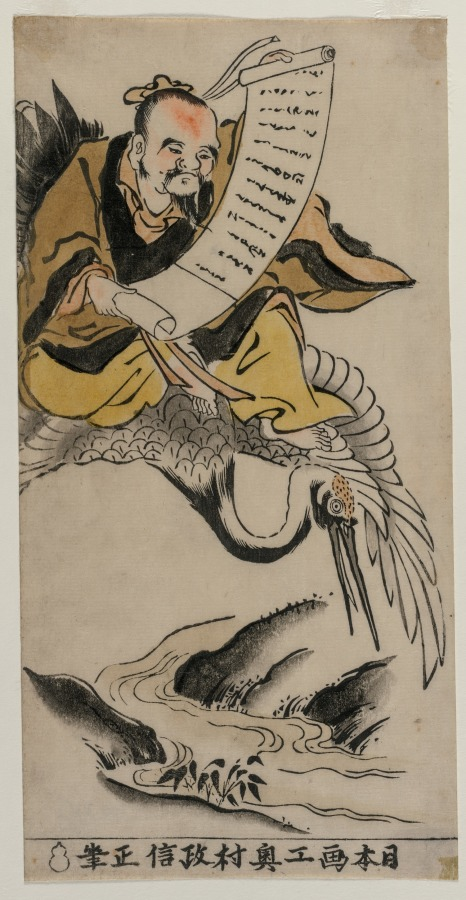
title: The Taoist Immortal Kung Ho (?) Riding a Crane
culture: Japan, Edo period (1615–1868)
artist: Okumura Masanobu (Japanese, 1686–1764)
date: c. mid 1720s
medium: color woodblock print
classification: Print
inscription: Signature: Nihon gako Okumura Masanobu shohitsu Artist Seal: gourd Publisher: Okumura Masanobu